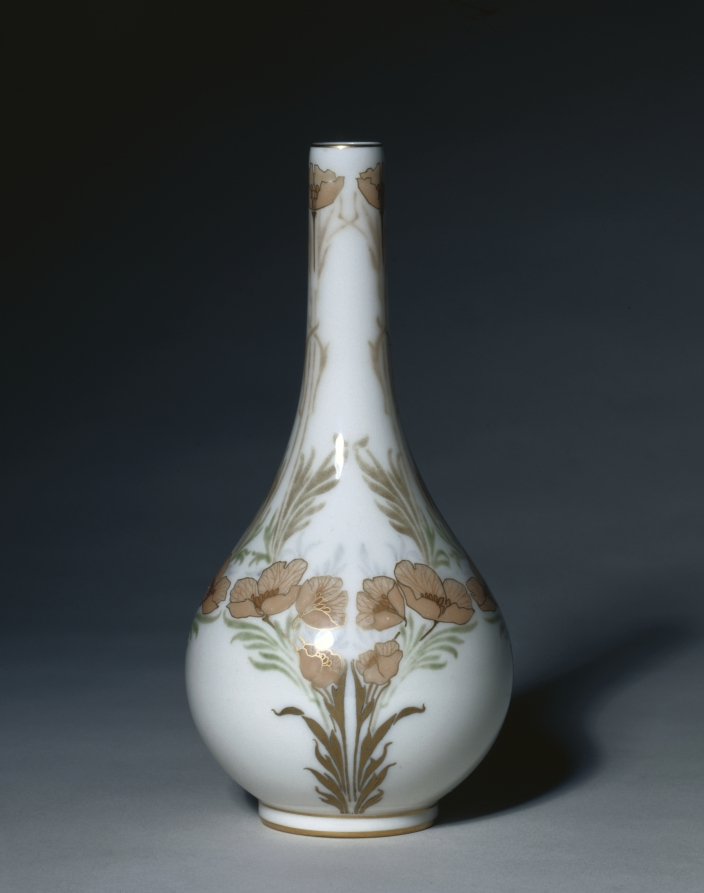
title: Vase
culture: France, Sèvres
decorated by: Jean-Charles-Hippolyte-Abel Leger (French)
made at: Sèvres Porcelain Factory (French, est. 1756)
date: 1905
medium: porcelain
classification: Ceramic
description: The shape of this vase, with its globular body and long neck, is influenced by the form of Chinese porcelain vases intended to hold singular flowers or branches. Delicate pink poppies with green and gold leaves decorate the vase.